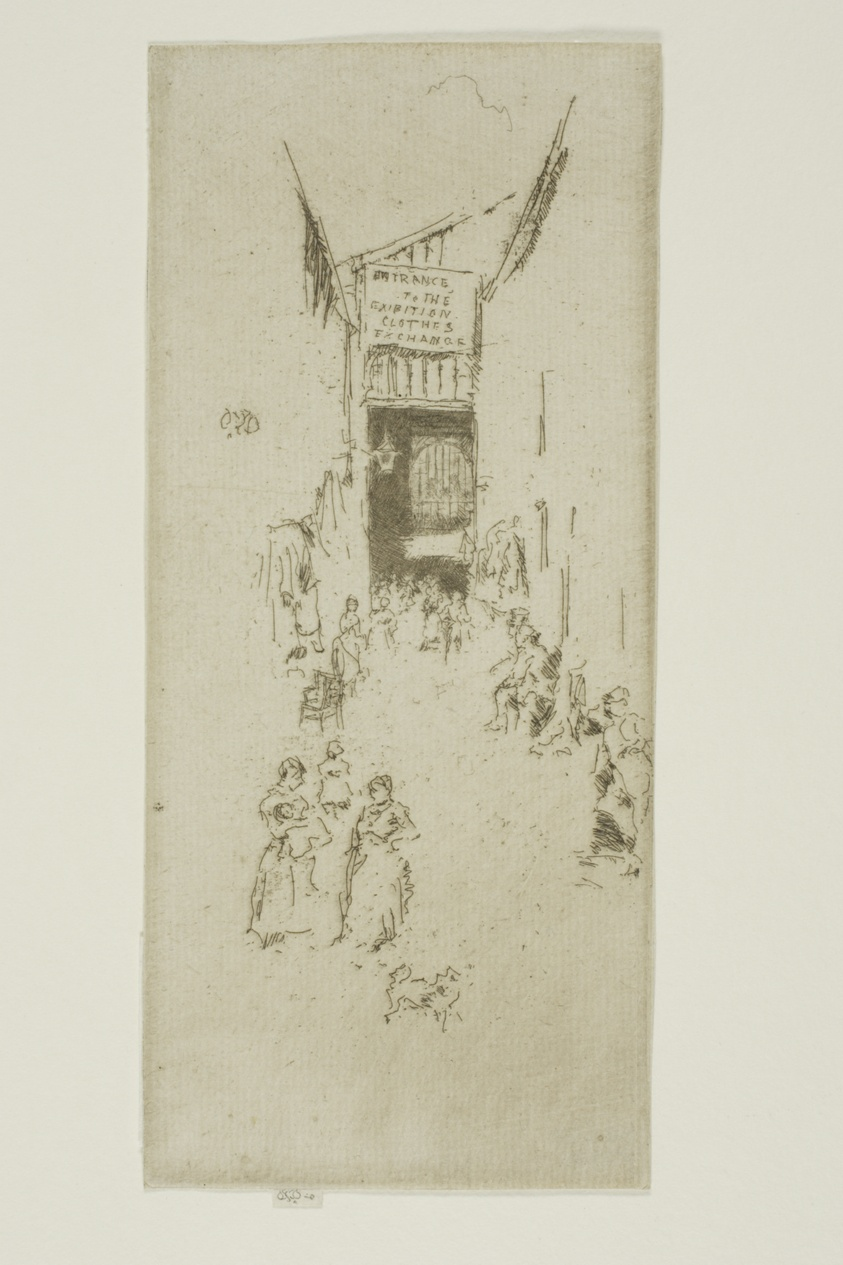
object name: Print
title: Fleur-de-lys Passage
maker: James McNeill Whistler (American, 1834-1903)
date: 1887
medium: Etching and drypoint with foul biting in black ink on ivory laid paper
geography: United States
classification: etching; foul biting; print; prints and drawing; drypoint; paper